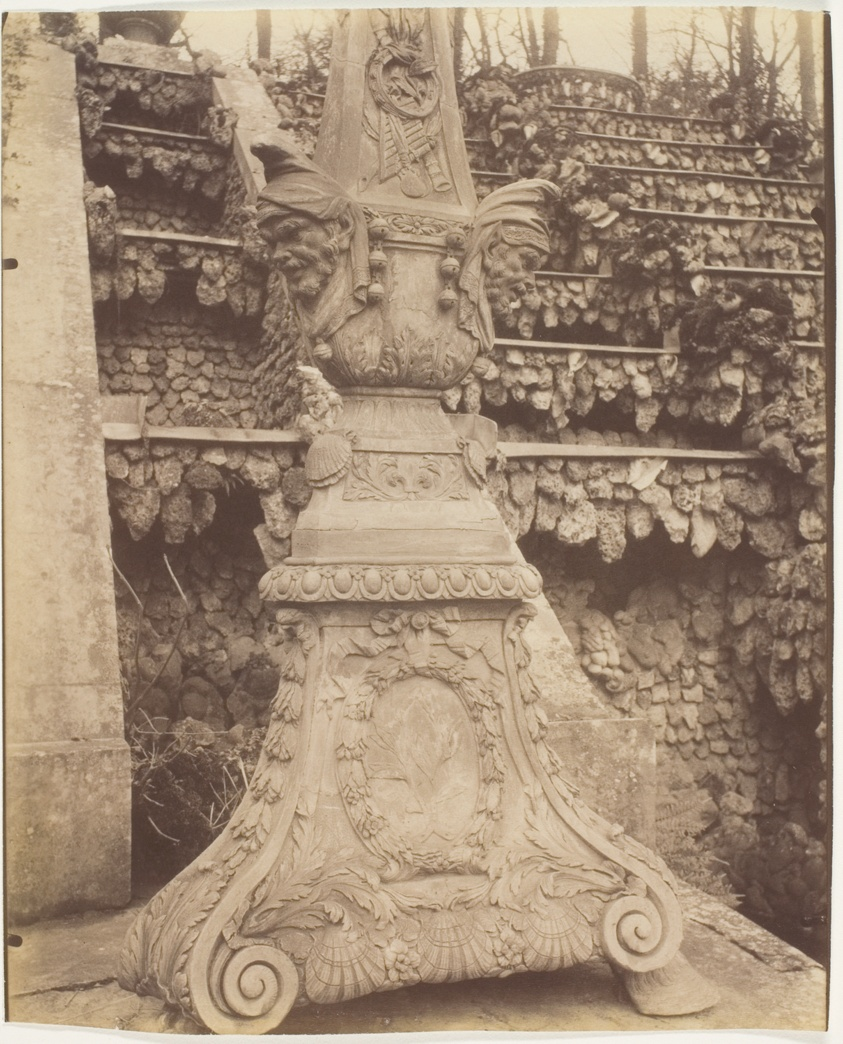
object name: Photograph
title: Versailles, Le Parc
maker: Jean-Eugène-Auguste Atget (French, 1857–1927)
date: 1906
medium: Albumen print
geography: France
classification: albumen silver print; photographic process; photography; photograph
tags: Collected by Hugh Edwards